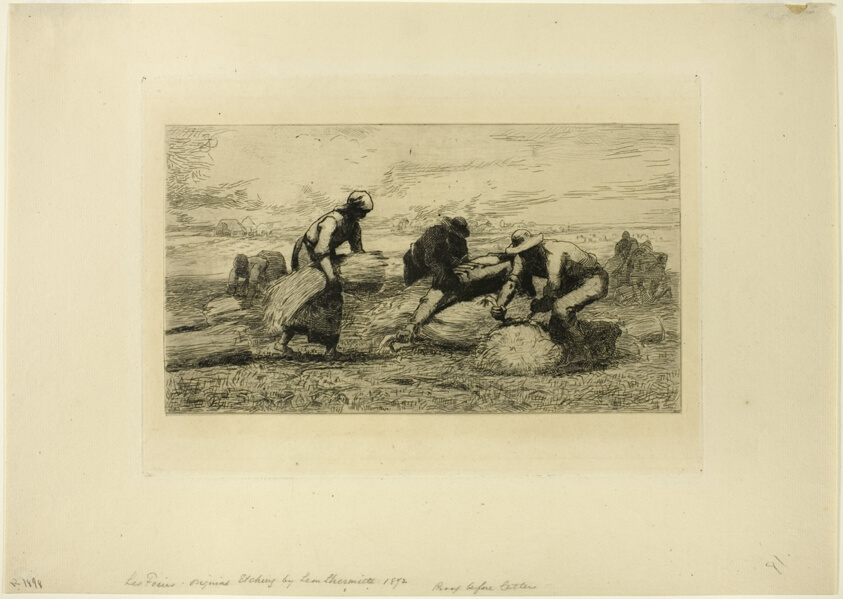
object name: Print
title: The Reapers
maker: Léon Augustin Lhermitte (French, 1844-1925)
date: c. 1872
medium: Etching on cream laid paper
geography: France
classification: etching; print; prints and drawing